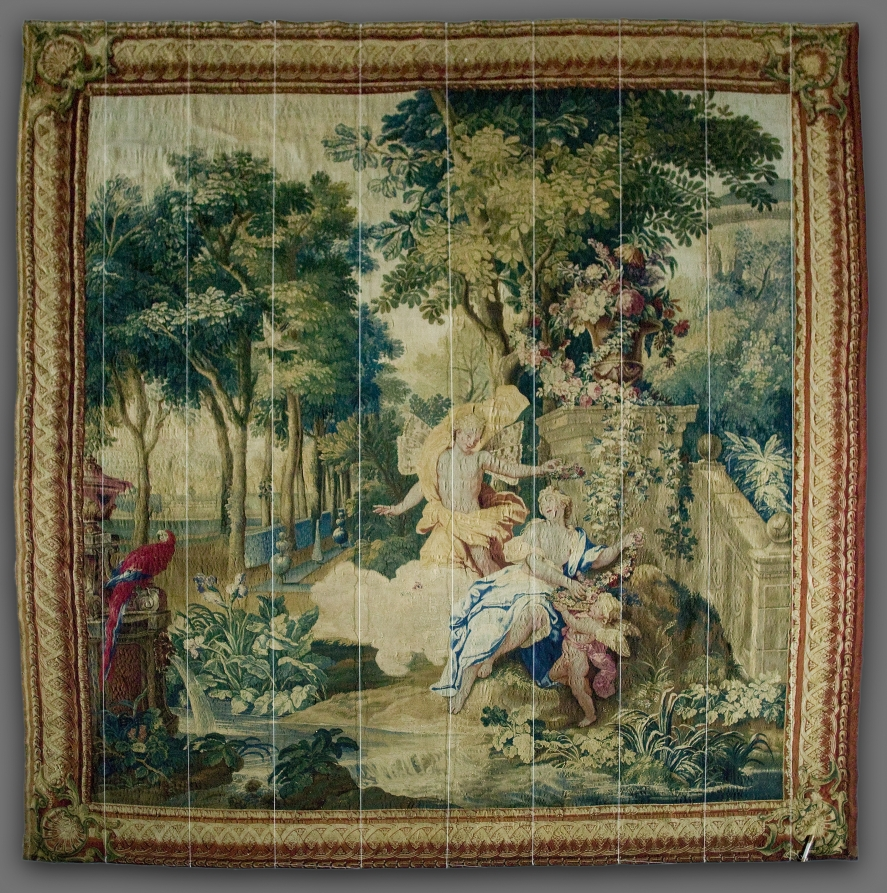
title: Flora and Zephyrus (from Set of Ovid's Metamorphoses)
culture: France, 18th century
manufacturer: Gobelins Manufactory (France, Paris, est. 1662)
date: 1704–1731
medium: tapestry weave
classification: Tapestry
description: In an abundant garden of trees and flowers, the goddess Flora sits beneath a vase of luscious flowers as her husband, the west wind Zephyrus, carried by a white cloud, reaches out to crown her with a floral chaplet. In this tapestry, Zephyrus’s wings resemble those of a butterfly or moth rather than a bird. The ravishing landscape echoes Flora and Zephyrus as springtime divinities. The parrot in the foreground is a colorful intermediary between the viewer and the gods represented in this tapestry.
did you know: During the French Revolution, Gobelins tapestries were sometimes disassembled to harvest the gold threads.